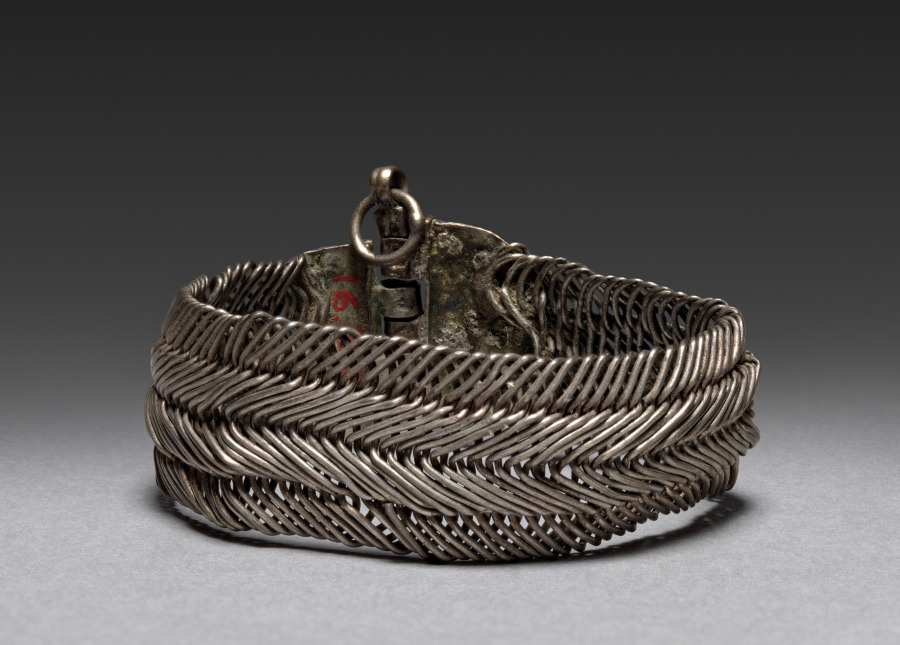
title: Bracelet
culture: Bulgaria, 18th-19th century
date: 1700s-1800s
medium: silver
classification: Jewelry